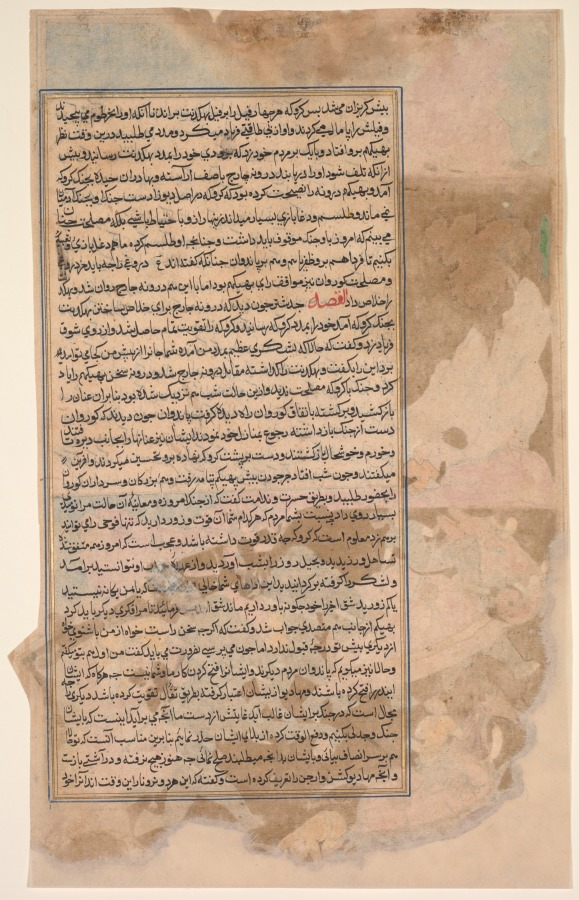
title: Ghatotkacha and three demons in his company chase Bhagadatta, from Bhishma-parva (volume six) of a Razm-nama (Book of Wars) adapted from the Sanskrit Mahabharata and translated into Persian by Mir Ghiyath al-Din Ali Qazvini, known as Naqib Khan (Persian, d. 1614)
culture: Mughal India, court of Jahangir (reigned 1605–27); made for Abd al-Rahim the Khan Khanan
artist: attributed to Fazl (Indian, active early 1600s)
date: 1616–17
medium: Gum tempera, ink, and gold on paper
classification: Painting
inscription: recto: Persian text in naskh script: . . . they were coming near, four four, five five chariots and their riders with one mace. Many elephants were killed. Sahadeva—the son of Jarasandha—drove toward Ashvatthaman and shot so many arrows at Ashvatthaman that Ashvatthaman lost consciousness. His charioteer took him to his father, Master Drona. Master Drona drove toward Sahadeva—the son of Jarasandha—and showered him with arrows; and he too began to wage battle against Drona. Master Drona was about to finish off Sahadeva when Nakula and three demons and three sons of Drupada came to the aid of Jarasandha’s son and began to fight with Master Drona, and Drona was fighting them all victoriously; and after some time the armies mingled together and became a battle for all, and Bhurishravas and Satyaki began to engage in fighting and Duryodhana came from a side and showered Bhima with nine arrows on the side. Bhima told his charioteer: “Drive my chariot carefully against these people for they are charging at me.” The charioteer drove his chariot toward Duryodhana. Bhima shot ten arrows at Duryodhana, and he lost consciousness, and ten brothers of Duryodhana were killed on this day, and the people who were around him scattered away and dispersed from around him. Duryodhana’s brothers, when they witnessed his plight turned at once toward Bhima and showered him with arrows, and Bhagadatta drove his elephant towards Bhima. The remainder of the fourth day from the eighteen days of battle between the Kauravas and the Paṇḍavas And this Bhagadatta had won such fame in the land of valor that he was deemed a black calamity amid calamities sent by God and for His creatures an instrument of swift death. He shot such an arrow at Bhima’s chest that he lost consciousness and fell leaning against the chariot. Bhagadatta grinned and shouted. Ghatotkacha, the son of Bhima, having witnessed this could no longer hold back and himself mounted an elephant he had made by talismanic means and was called Airavata and summoned three other demons, which he had made in his own image, and had them ride three elephants constructed by art, so that from one demon, four demons went toward Bhagadatta, fighting. And among those elephants, one was called Anjana, the second Vamana, and the third Mahapadma. And Ghatotkacha’s elephants had such an awesome presence that whoever saw them imagined them in rut and from [cont. on verso]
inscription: Verso: text of Ghatotkacha and three demons in his company chase Bhagadatta: Persian text in naskh script: [cont. from recto] them they would flee. Then the demon drove hard all four elephants toward Bhagadatta until they managed to roll him in their trunks and trampled on his elephant. He was shouting out of despair and seeking help. At this time Bhishma noticed him and shouted at his people to come quickly to Bhagadatta’s aid and save him before he expired. Master Drona, with a well-ordered line of troops and choice warriors, came to battle with the demon. And Bhishma had advised Drona that “This demon is in origin born of a demon, and his way of fighting is not like that of human beings, and he knows a great deal about talismans and magic; therefore, you should act cautiously, and in fact I advise you to cease battle with him today so that if he has indulged in talismans and magic, we too can devise trickeries and ruses of our own so that we gain victory over him tomorrow, for as they say, one should treat like with like.” And the advice of the Kauravas was similar to that of Bhishma. But nevertheless Master Drona set out to free Bhagadatta. Back to the story: when Yudhisthira saw that Master Drona had come to fight the demon in order to free Bhagadatta, he came to the aid of the demon who now was fully backed and supported and who bellowed out joyously: “Now that a massive army has come to my aid, where can you take your life to escape from me?” He said this and left Bhagadatta in order to face Drona. Drona remembered Bhishma’s words and thought it inadvisable to fight the demon. Meanwhile, night was drawing close, and so he pulled back his reins, and accompanied by the Kauravas, returned to their tents. When the Pandavas saw that the Kauravas had ceased fighting and returned to their quarters, they too turned their reins toward their tents and returned homeward with cheer and joy and would slap the demon on the back and express their praise and approval. When night fell, Duryodhana came to Bhishma and summoned all the notables and commanders of the Kauravas and said in a woeful and regretful manner: “Having reviewed and examined today’s battle, I have become extremely despondent and despair of you people. Each one of you has the power and strength to tackle an entire body of troops, and it is clear how much power the demon wields. It is a wonder to me that today too you had agreed together to take it easy and ride out the day and were not capable of countering him, and you have gathered your troops and come home. These actions of yours suggest that either you are not loyal to and bonded with me, or that you just lack strength. How can we believe the latter hypothesis? So we are left with the first hypothesis. So please explain so that I can arrive at another solution.” Bhishma responded to this on behalf of all of them, and said: “Although if you hear the truth from me or from any other person, you will not deem it acceptable, nevertheless since you have posed the question, one must respond out of necessity. I told you at the beginning and tell you again now that Pandavas belong to another breed of people, and overcoming them is no business of yours or ours, for since they have overcome Indra, and Madhu the demon has gained credit from them and taught them magic and sorcery, it would be impossible for the king to overcome them in battle. At most what we are capable of is to indulge in some skirmishes with them and play for time and try to save ourselves from their calamity. Therefore, it would be fitting if you would now see reason and make peace with them on their terms since nothing has yet happened, and the door to reconciliation is open, and what Madhu the demon has related of Krishna and Arjuna––he has said that these two are the Nara and Narayana of the time––you have . . .”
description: The red demons riding elephants were magically generated in multiples by Ghatotkacha, the son of one of the protagonists of Book of Wars. Though created by magic, the elephant-riding demons still caused problems for their adversaries and forced them to retreat. This scene took place on the fourth of 18 days of heated battle. The Mughal emperor Akbar (reigned 1556–1605) commissioned a translation of the ancient Sanskrit epic Mahabharata into the Mughal court language of Persian and distributed copies to members of his court. He believed that the epic provided insight into how to rule the people of India. The chief minister to both Akbar and his successor, Jahangir, commissioned his own lavishly illustrated copy, from which this page has come.